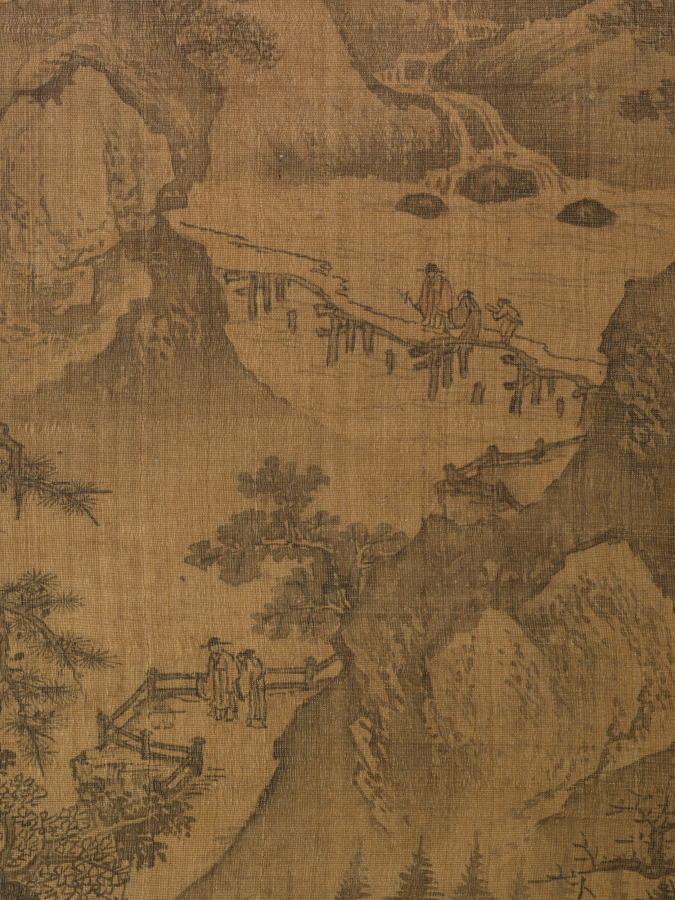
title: Mountain Market, Clear with Rising Mist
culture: Korea, Joseon dynasty (1392–1910)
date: early 1500s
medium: Hanging scroll; ink on silk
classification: Painting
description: This painting depicts several vignettes of the scholar-hermit’s various activities. In the lower left corner, the scholar-hermit is portrayed welcoming his guest in the courtyard. In the middle section on the lower bottom, the scholar and his guest are shown encountering another traveler on the bridge and exchanging their greetings. After crossing the bridge, the scholar visits a friend who lives in a compound of multiple buildings. The two friends decide to take a short walk. Both appear in a terraced cliff, enjoying a mountain vista and the fragrance of an old pine tree carried by the gentle wind. The scholar continues his journey with his two servants. They are portrayed crossing a winding wooden bridge. Right beyond the colossal rocky mountain, a panoramic view to a bustling market place unfolds, suggesting that it may be the place where the scholar-hermit’s entourage would visit. Perhaps the scholar need to buy items such as books, rolls of papers, and brushes, all essential to scholarly life. Toward the upper left corner, another group of travelers is landing on the river bank that leads to the city gate; they may be headed to the multistoried Buddhist stupa nestled on the top of the mountains.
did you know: Due to its stylistic features, this painting has long been believed to be a Chinese painting of the Northern Song period, dated to the 12th century.